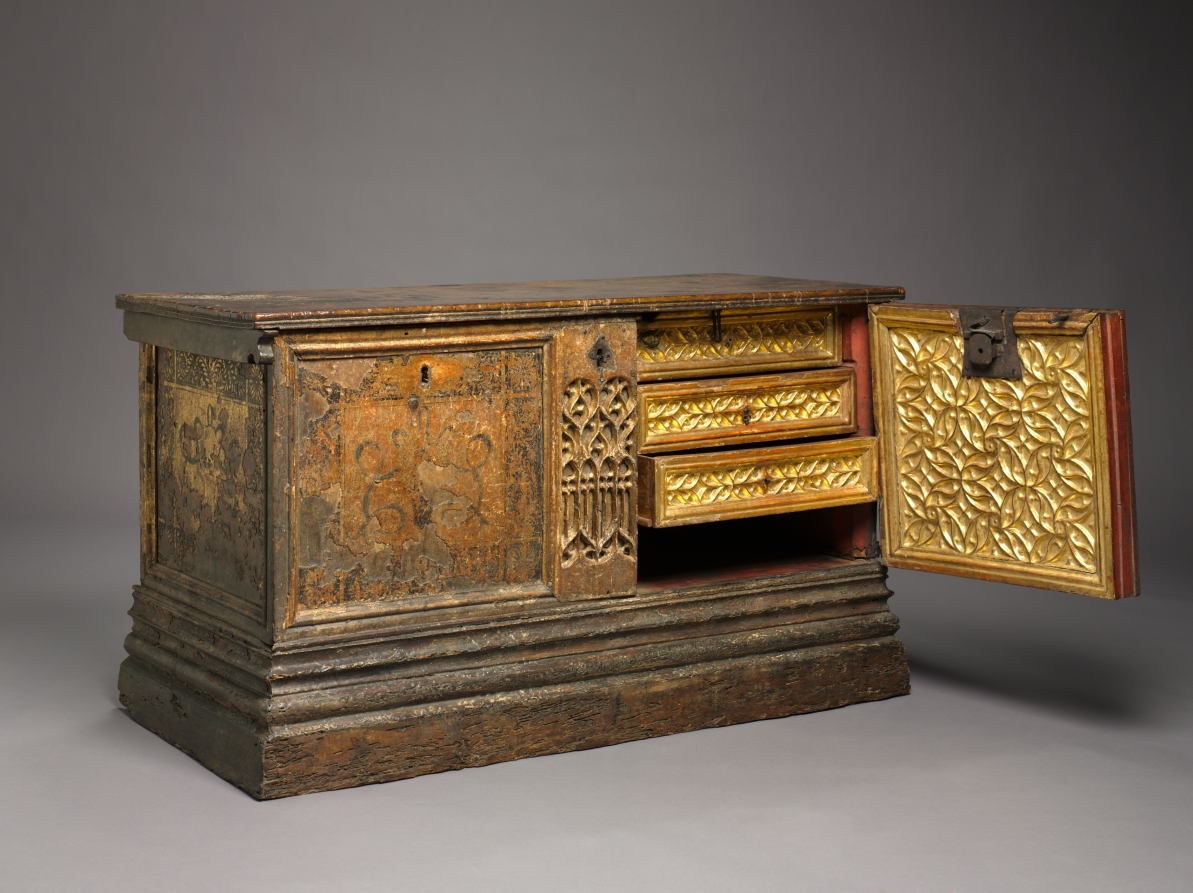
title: Marriage Chest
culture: Spain, Catalonia, Barcelona(?), early 16th century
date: c. 1500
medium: wood with painting and gilding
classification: Furniture and woodwork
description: Elaborately carved chests were given by husbands to their wives on the occasion of the wedding. Inside the home, such chests were used for the storage of clothing and were elaborately painted and gilded. This chest is an example of a type produced in Barcelona from the late 1400s onward.